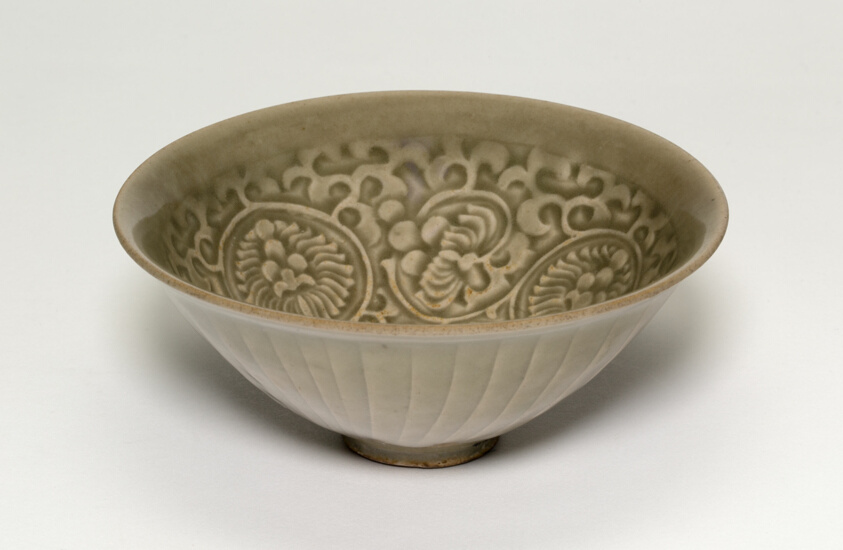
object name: Vessel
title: Bowl with Peonies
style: Chinese (culture or style)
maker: China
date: Song dynasty (960–1279)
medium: Celadon-glazed stoneware with underglaze molded decoration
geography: China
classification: bowl; stoneware; dish (vessel); asian art; ceramics; vessel